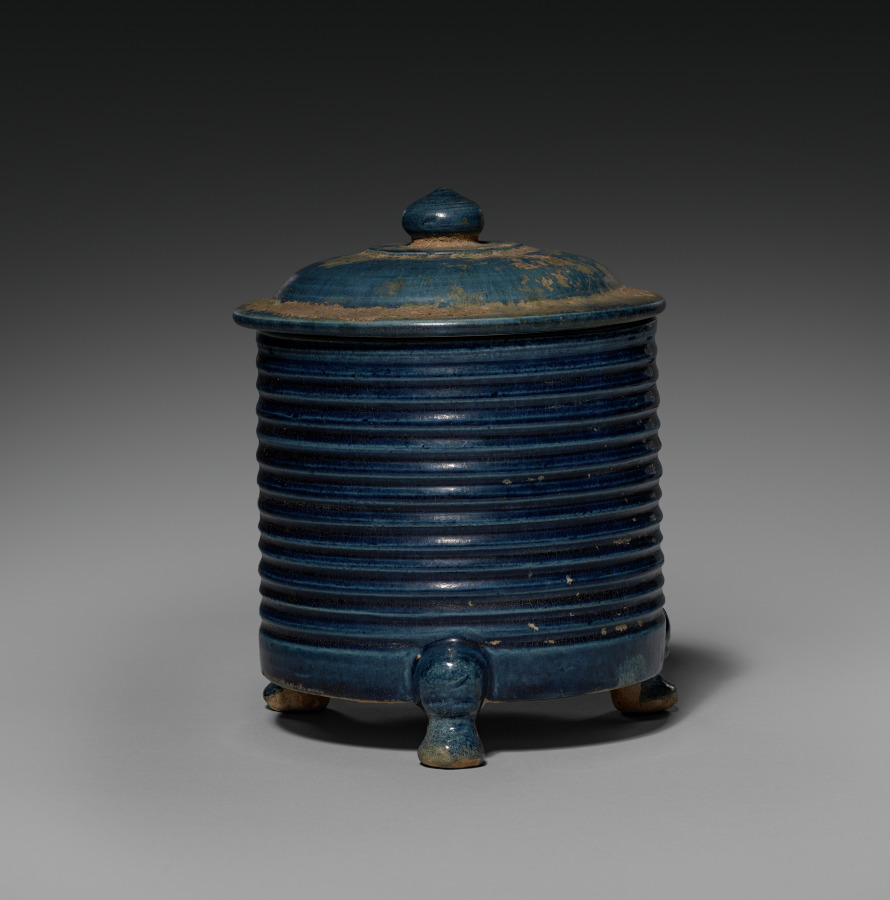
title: Covered Jar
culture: China, Tang dynasty (618–907)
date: early 700s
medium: glazed earthenware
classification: Ceramic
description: This covered cylindrical jar with three animal feet is lavishly covered with a cobalt blue glaze in the exterior and an amber glaze in the interior. Of the colored lead glazes of sancai (three-color) ware, blue was preeminent and precious. Imported cobalt from Persia (Iran, Afghanistan) was used as a glaze colorant that yields a rich, brilliant blue of considerable splendor.